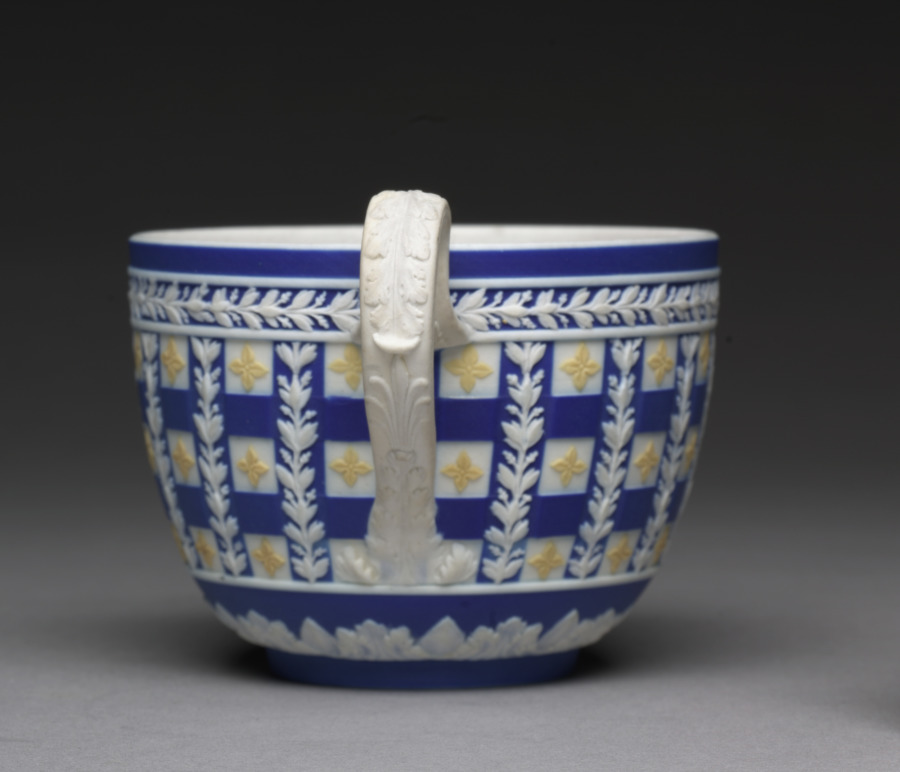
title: Cup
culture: England, Staffordshire, 18th century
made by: Wedgwood Factory (British)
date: c. 1784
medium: jasper ware with relief decoration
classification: Ceramic